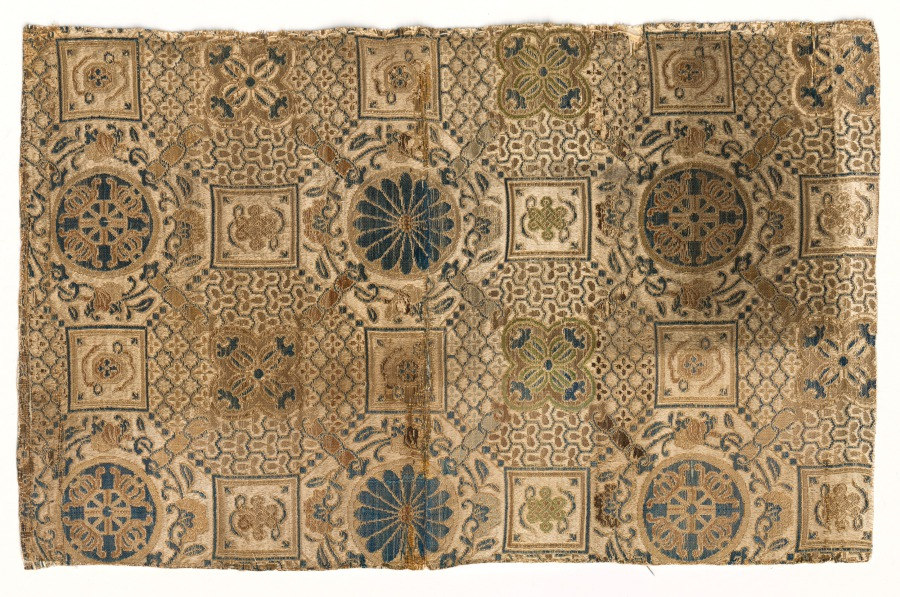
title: Textile Fragment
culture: Japan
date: 1800s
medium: silk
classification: Textile